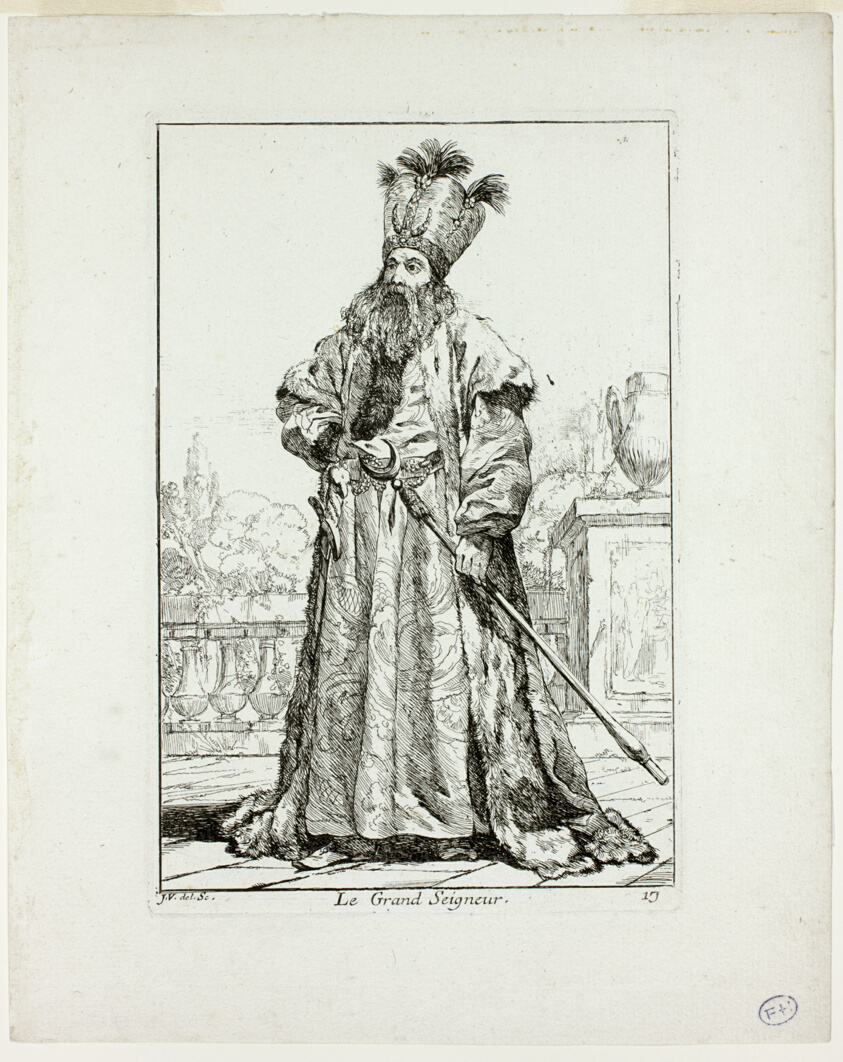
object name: Print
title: Le Grand Seigneur, plate seventeen from Caravanne du Sultan à la Mecque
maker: Joseph-Marie Vien, the elder; French, 1716–1809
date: 1748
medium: Etching on ivory laid paper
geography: France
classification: etching; paper; print; prints and drawing